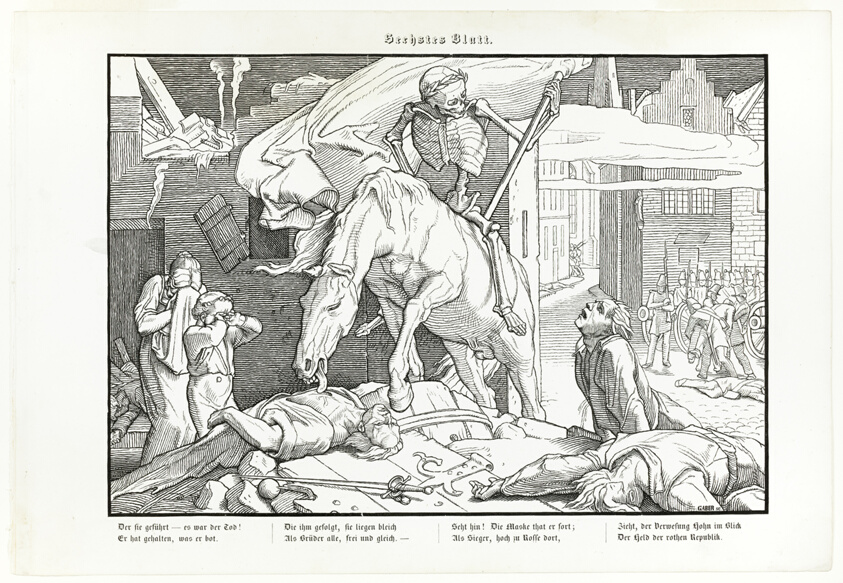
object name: Print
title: Auch ein Todtentanz, plate VII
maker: Alfred Rethel (German, 1816-1859)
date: 1848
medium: Wood engraving in black on ivory wove paper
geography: Germany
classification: woodcut; print; prints and drawing